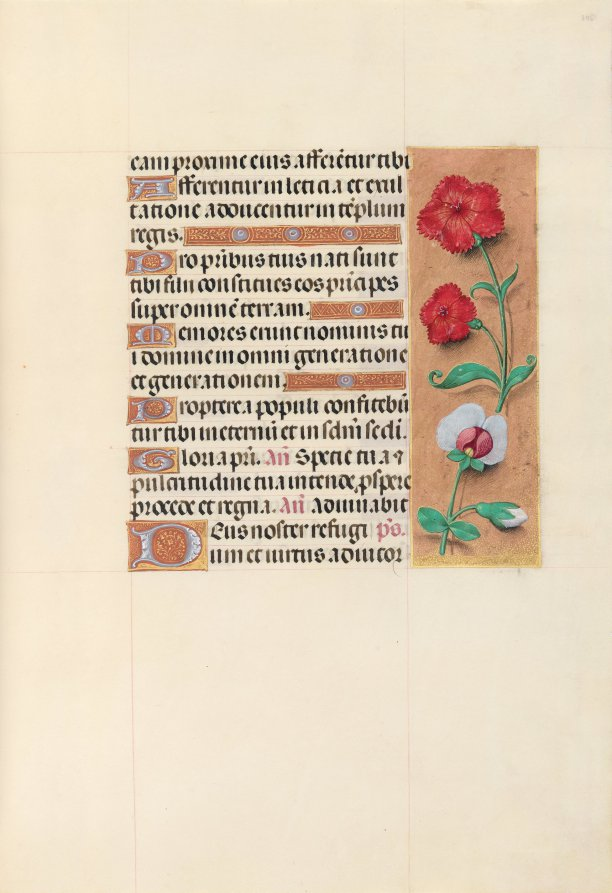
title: Hours of Queen Isabella the Catholic, Queen of Spain: Fol. 105r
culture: Flanders, Ghent and Bruges, late 15th century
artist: Master of the First Prayerbook of Maximillian (Flemish, c. 1444–1519)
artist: and Associates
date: c. 1500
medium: ink, tempera, and gold on vellum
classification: Bound Volume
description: This manuscript was illuminated by a circle of at least five highly organized manuscript painters active in the Flemish cities of Ghent and Bruges. The principal illuminator was Alexander Bening, who painted the majority of the book's miniatures. Manuscripts produced by this circle of artists are renowned for the decoration of their borders, which typically feature a rich variety of realistically-painted flowers, birds, and butterflies. This prayer book, called a book of hours, was intended not for a cleric, but for the private devotions of a lay person-in this case, Isabella the Catholic, Queen of Spain (1451-1504). Isabella's coat of arms embellishes the book's frontispiece. It is unlikely that the book was commissioned by the Queen herself; rather, she probably received it as a diplomatic gift from someone courting her patronage, perhaps Cardinal Francisco Jimenez de Cisneros. A Franciscan friar, Jimenez was dependent upon Isabella for his advancement, first to the post of Queen's confessor in 1492, and then to Archbishop of Toledo in 1495.